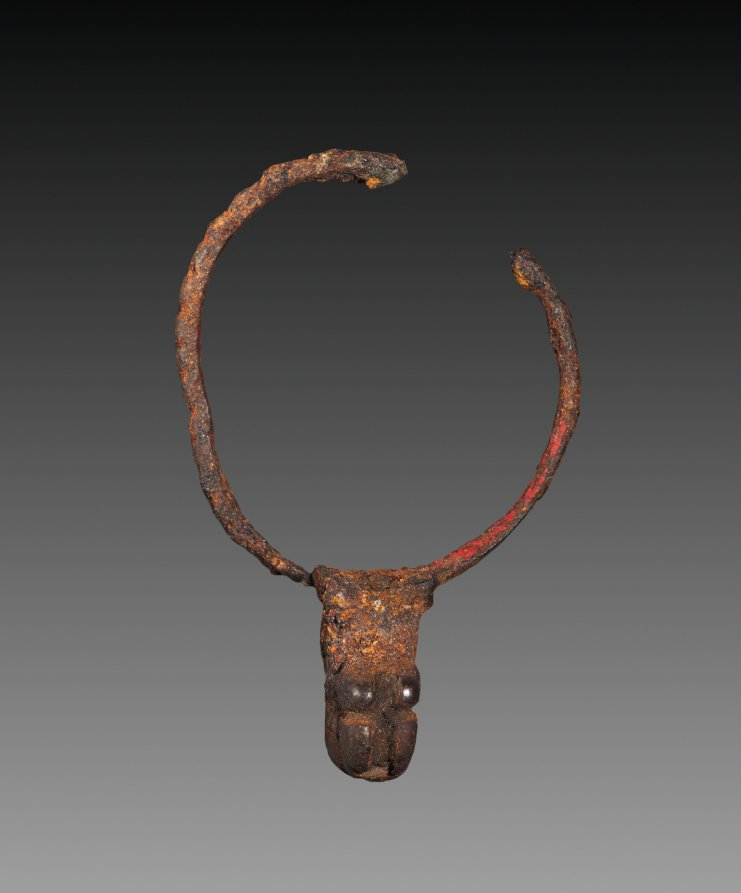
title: Key Ring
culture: Egypt, Greco-Roman period (332 BCE–395 CE), Roman empire (30 BCE–395 CE)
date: 30 BCE–395 CE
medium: bronze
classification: Implements